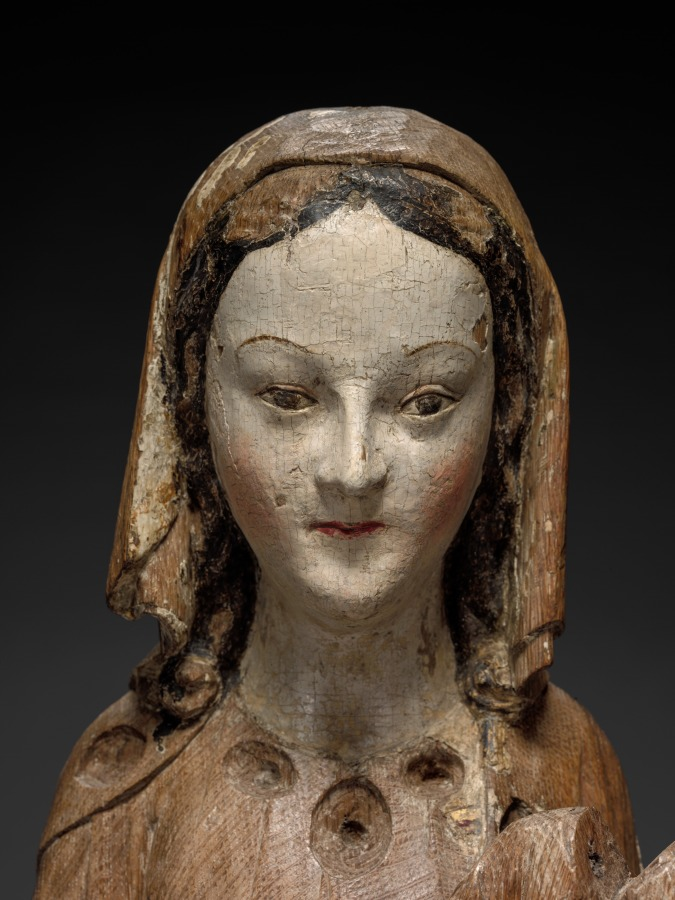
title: Virgin and Child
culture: Mosan (Valley of the Meuse), Liège(?), late 13th century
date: late 1200s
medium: wood (oak) with polychromy and gilding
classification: Sculpture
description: This sculpture is a rare survival in wood from the valley of the Meuse River (modern Belgium and Holland), an important region for the production of ecclesiastical art in the 1100s and 1200s. The elegantly draped figure is remarkable for the preservation of much of its original paint and gilding, including the Virgin's gilded mantle highlighted with decorative bands of geometric patterns and the green dragon on which she stands. There are small settings around the Virgin's neck and along the border of the mantle that would have originally been set with gem and glass cabochons in imitation of the richly adorned metalwork for which Mosan art was highly esteemed. The settings for these cabochons provide some hint of the original opulence of this sculpture. The Virgin's serene features and beautiful countenance are noteworthy, as is the refined execution of the draperies.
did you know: Dragons, like the one Mary is standing on, sometimes look more like snakes in medieval art.